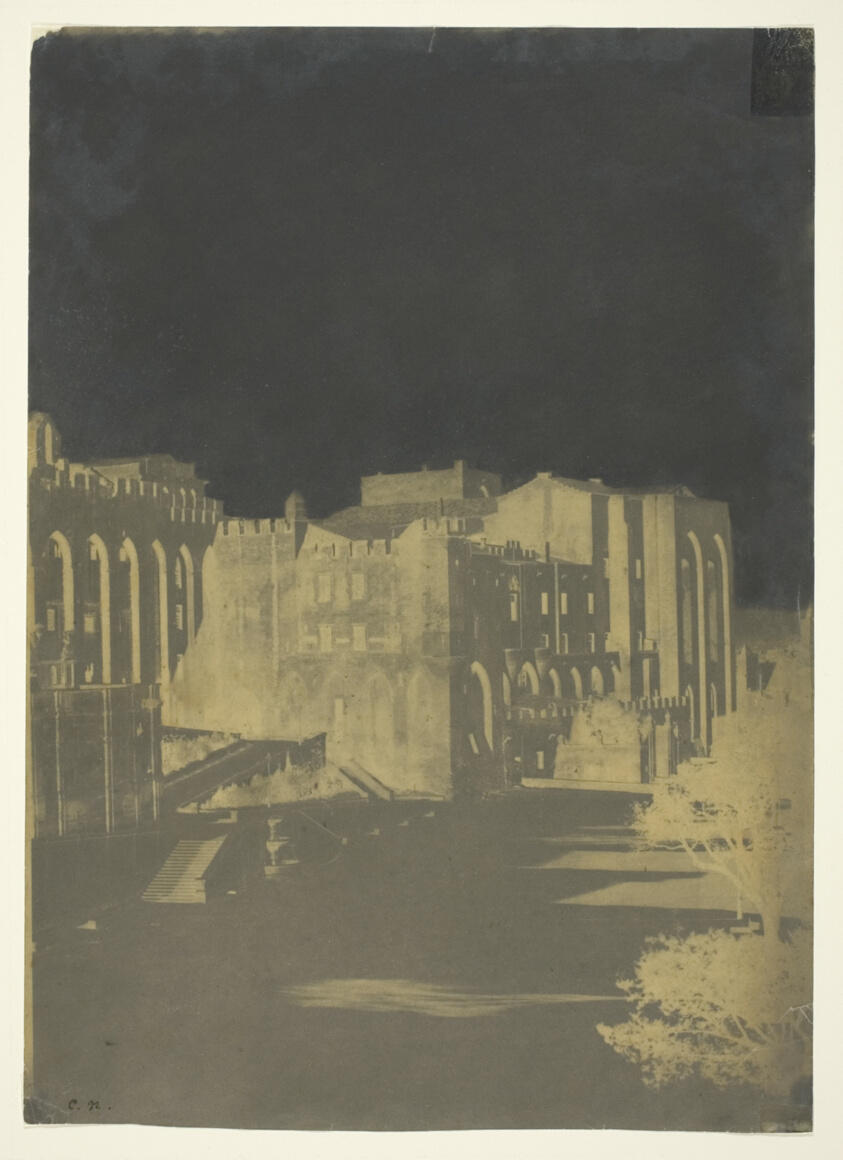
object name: Photograph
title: The Pope's Palace, Avignon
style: 19th century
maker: Charles Nègre (French, 1820–1880)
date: c. 1851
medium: Calotype negative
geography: France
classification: photographic process; photography; photograph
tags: Collected by Hugh Edwards